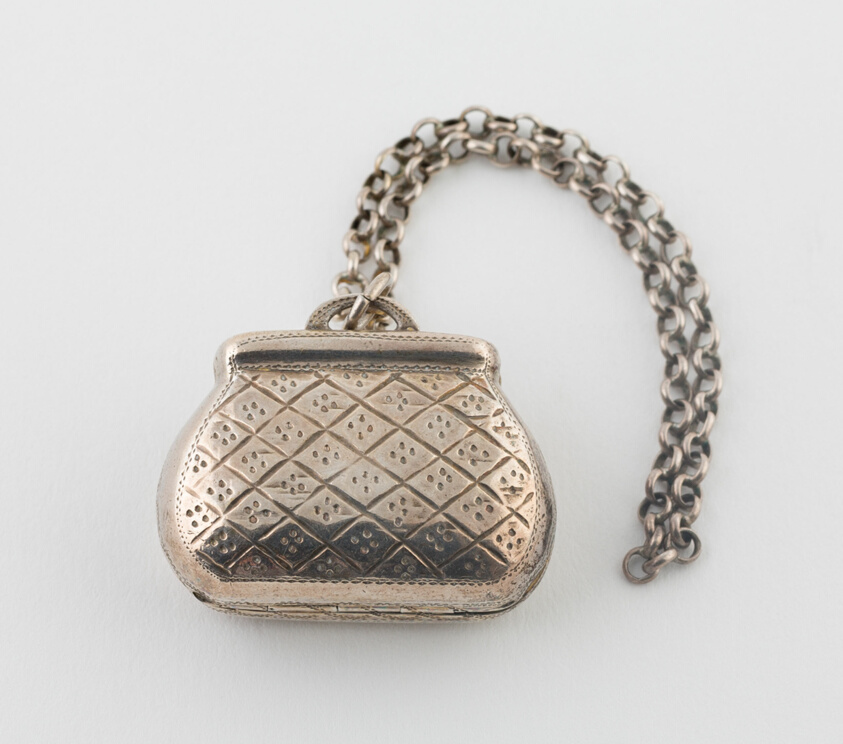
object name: Metalwork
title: Purse-Shaped Vinaigrette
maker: Joseph Willmore; English, active 1808-1855; Birmingham, England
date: 1818/19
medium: Silver and silver gilt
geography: Birmingham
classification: container for personal use; vinaigrette (container for health care); european decorative arts; metalwork; silver; decorative object/ornament